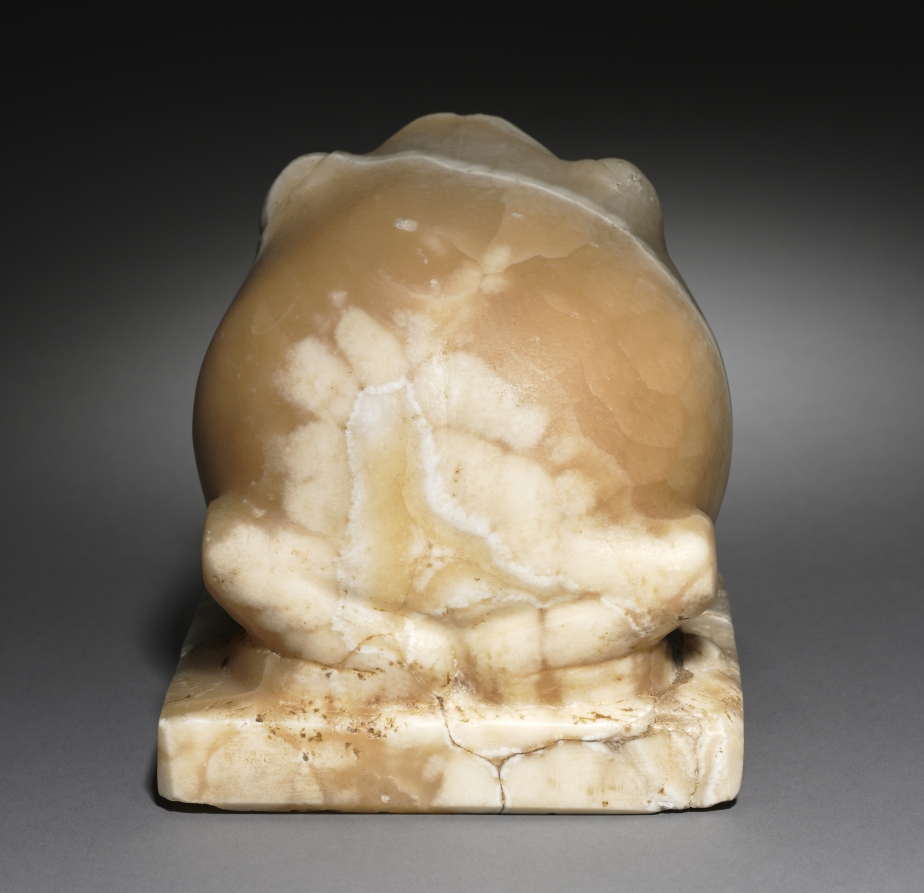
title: Statue of Heqat, the Frog Goddess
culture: Egypt, Predynastic (5000–2950 BCE), Naqada III (3200–3000 BCE)–Egypt, Early Dynastic (2950–2647 BCE), Dynasty 1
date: c. 2950 BCE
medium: travertine (Egyptian alabaster)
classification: Sculpture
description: During the Predynastic period statues of animals are much more common than those of humans. This statue of a frog stands at the beginning of a great tradition of animal sculpture in Egyptian art. The sculptor has shown great sensitivity to the natural banding of the stone, using it to enhance the roundness of the animal's form. Small frogs, mostly of faience, are among the most common votive offerings deposited at early temple sites. The frog's exact religious significance in the Predynastic period is unknown, but in later times it was most often identified with Heqat, the goddess who assisted at childbirth.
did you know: This probably represents a puffed-up Bufo viridis, one of two types of "frogs" (it is actually a toad) represented in Egyptian art.